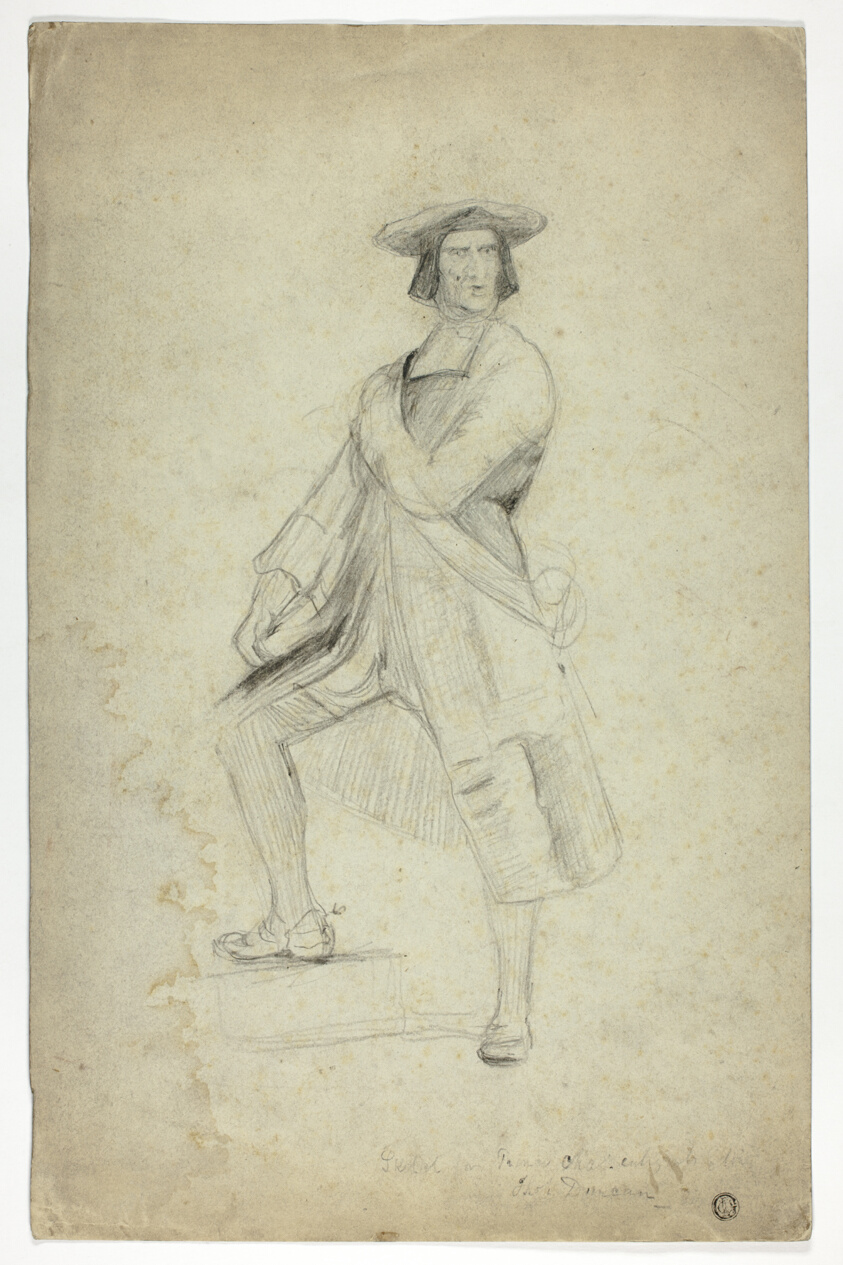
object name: Drawing and Watercolor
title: Study for Standing Man Wearing Sash and Striking Dramatic Pose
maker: Thomas Duncan (Scottish, 1807-1845)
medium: Charcoal with graphite and traces of black crayon on ivory wove paper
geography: Scotland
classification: graphite; drawings (visual works); prints and drawing